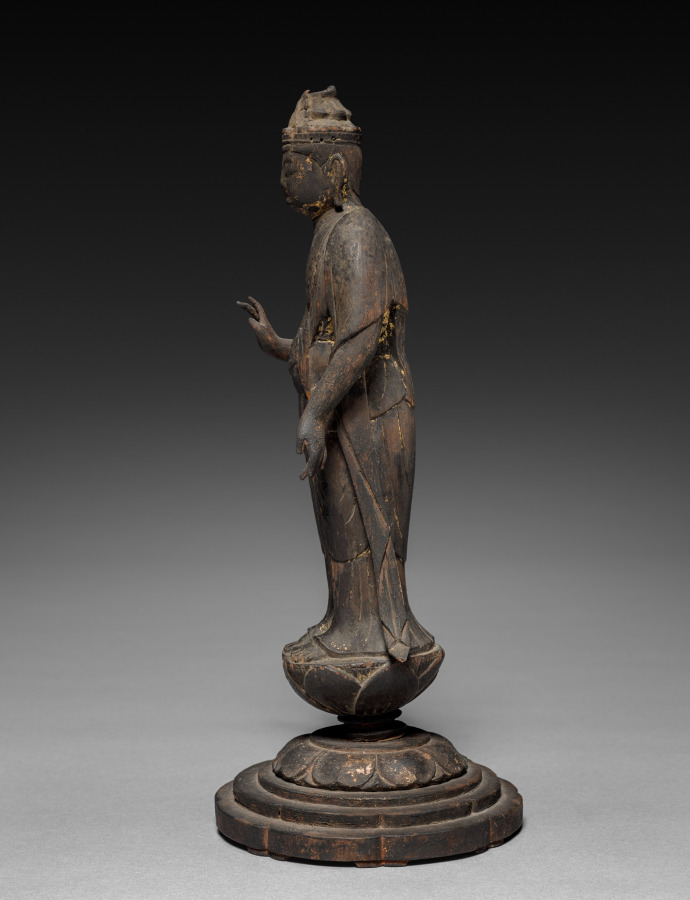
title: Kannon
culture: Japan, Heian period (794–1185) or Edo period (1615–1868)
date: 1000s or c. 1800–1868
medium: Wood with traces of lacquer and gilding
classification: Sculpture